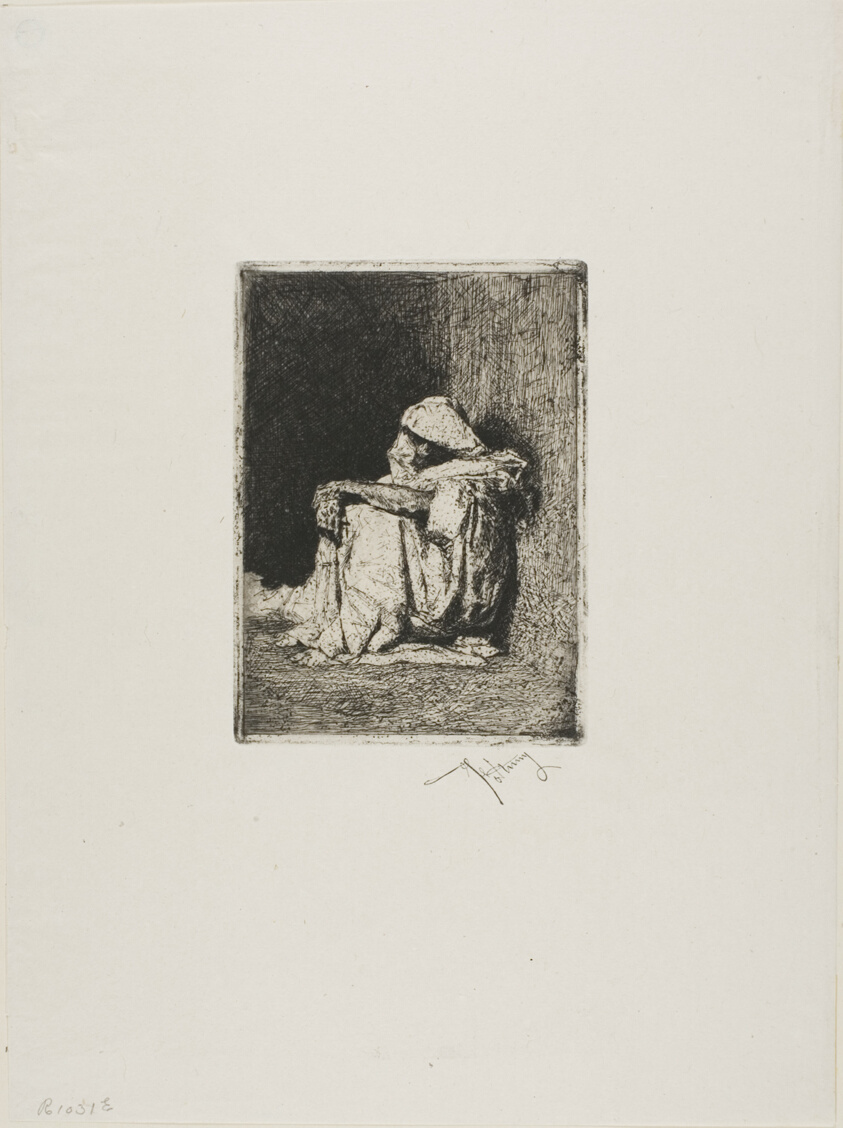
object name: Print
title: Arab Seated, His Hands Crossed on His Knees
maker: Mariano José María Bernardo Fortuny y Carbó; Spanish, 1838-1874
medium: Etching on paper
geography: Spain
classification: etching; print; prints and drawing